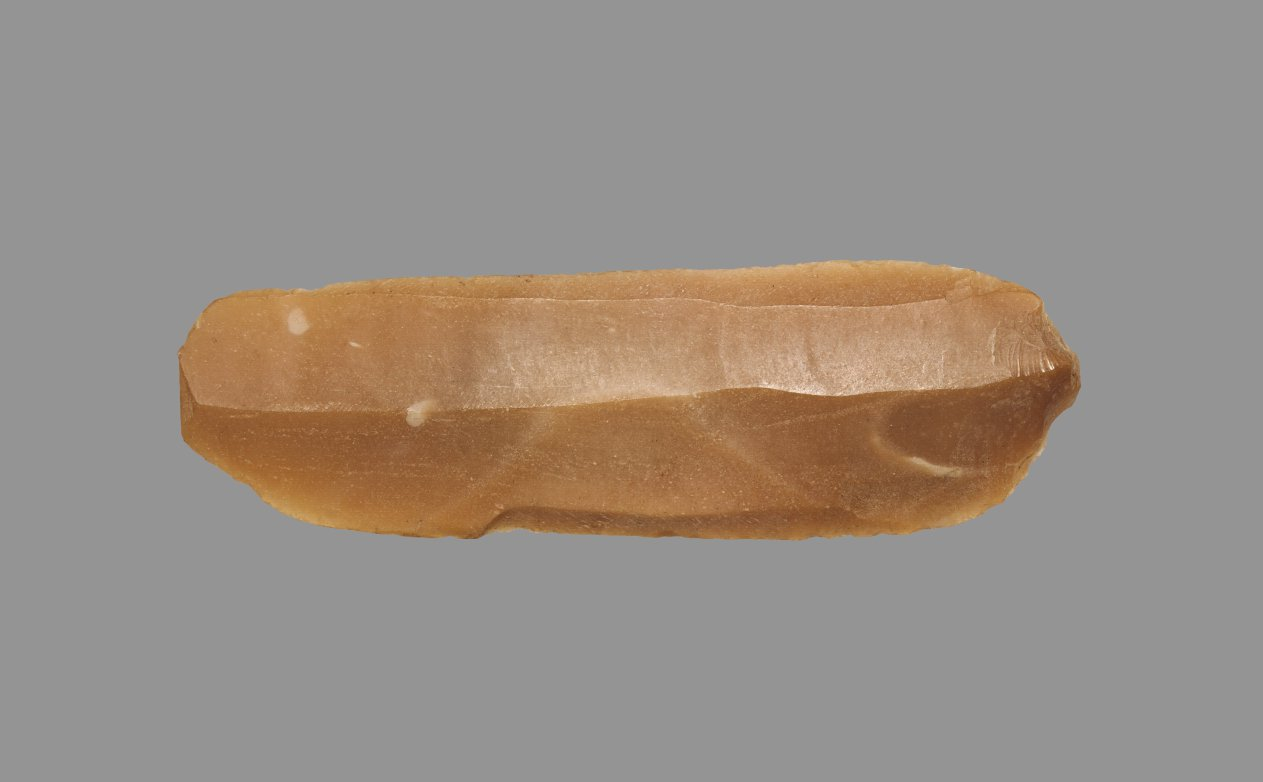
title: Sickle Blade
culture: Egypt, Middle Kingdom (2040–1648 BCE), Dynasty 12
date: 1980–1801 BCE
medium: flint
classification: Implements